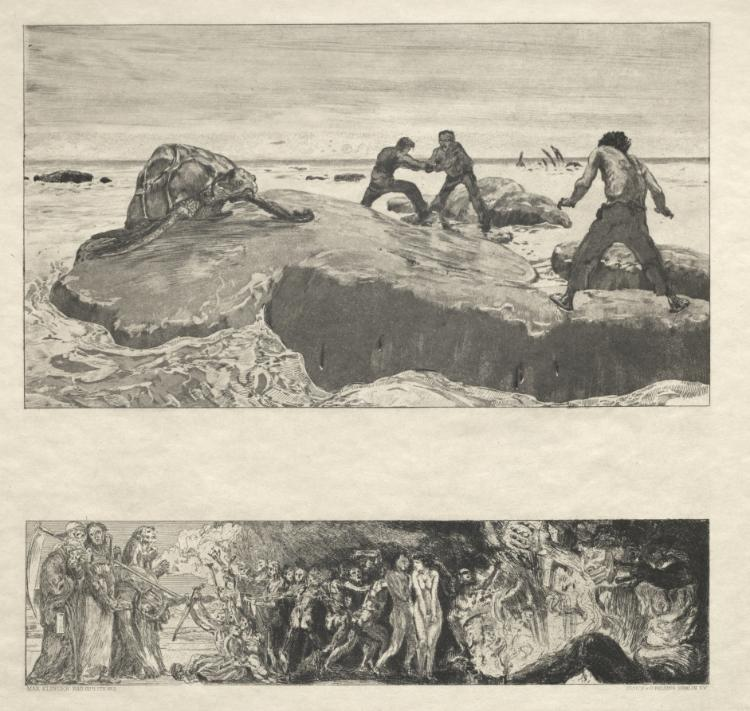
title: Vom Tode I, (Opus II, 1889) No. 2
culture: Germany, late 19th century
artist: Max Klinger (German, 1857–1920)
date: 1889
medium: etching and aquatint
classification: Print